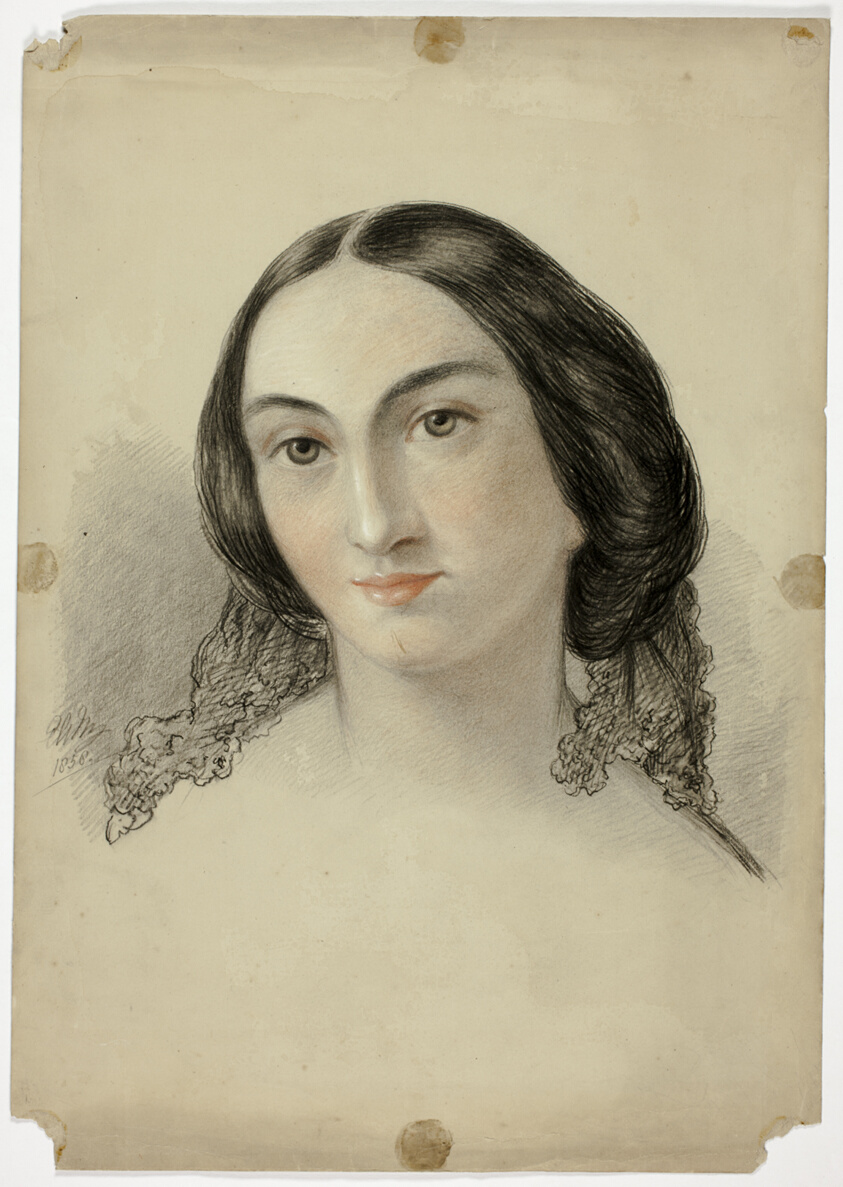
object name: Drawing and Watercolor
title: Female Portrait Head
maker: Elizabeth Murray (English, c. 1815-1882)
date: 1858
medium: Pastel on gray wove paper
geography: England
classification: chalk; drawings (visual works); prints and drawing